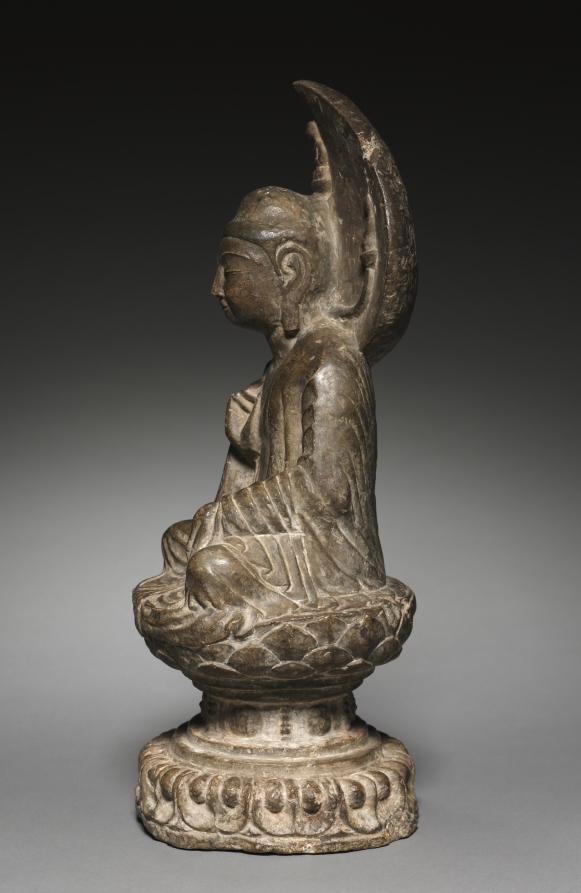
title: Amida Buddha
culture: China, Sui dynasty (581-618)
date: 581–618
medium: limestone with traces of polychromy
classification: Sculpture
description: The leaf-shaped halo of this seated Buddha bears the rare, unusual icon of the three nirmana Buddhas, which represents a symbolic homage of the Buddhas of the past, the present, and the future—manifestations of the Buddha in infinite time and space. Another interpretation is that the three figures without halos represent souls reborn in the Western Paradise thanks to Amida Buddha's divine intervention.